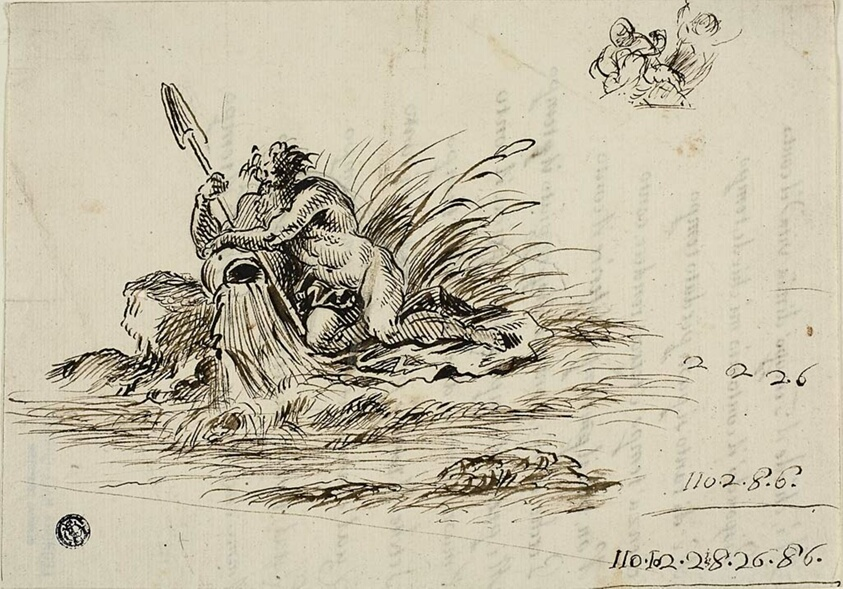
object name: Drawing and Watercolor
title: Recto: A River God; verso: a sonnet by Santi Rinaldi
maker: Unknown artist; Italian, late 17th century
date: late 1600s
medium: Pen and brown ink, with traces of graphite, on ivory laid paper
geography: Italy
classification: pen and ink drawings; drawings (visual works); prints and drawing